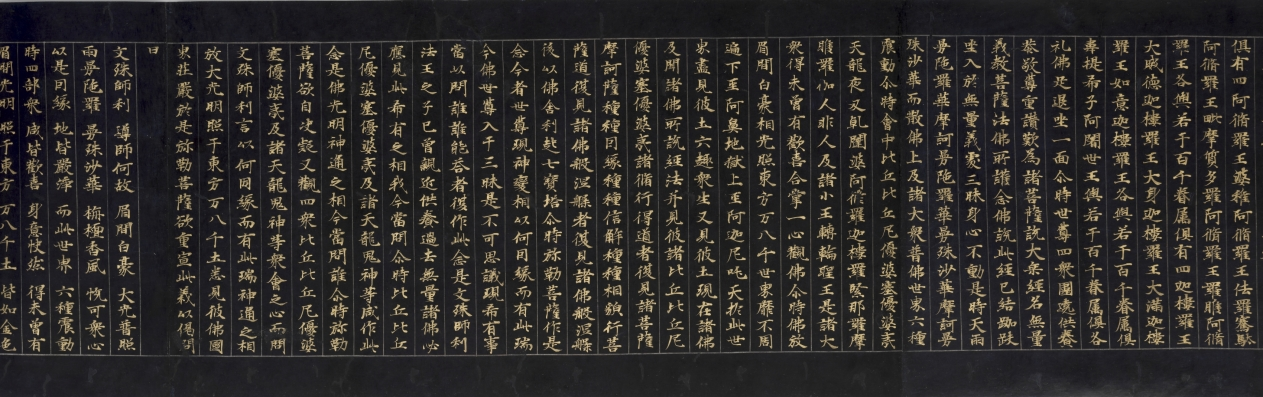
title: Lotus Sutra with a Frontispiece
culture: China, Song dynasty (960–1279)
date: late 1100s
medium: handscroll; gold ink on indigo sutra paper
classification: Painting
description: The frontispiece of this sutra, a sacred Buddhist scripture, illustrates episodes mentioned in the Buddha’s teaching. The sutra begins with a description of the historic Buddha Shakyamuni’s assembly on Vulture Peak. On the right, the Buddha sits amid members of his congregation: lohans (or arhats), bodhisattvas, gods, and other beings. The narrative proceeds from right to left. Heavenly light emanates from Shakyamuni’s brow to “illuminate the eighteen thousand worlds to the east.” Illustrated immediately below the ray is the sutra’s promise that if anyone carves or paints images of the Buddha “they will achieve the Buddha path.” The female figures in the frontispiece point to another promise made in this popular Mahayana school sutra, namely that female devotees and nuns who read the sutra are promised Buddhahood and salvation.